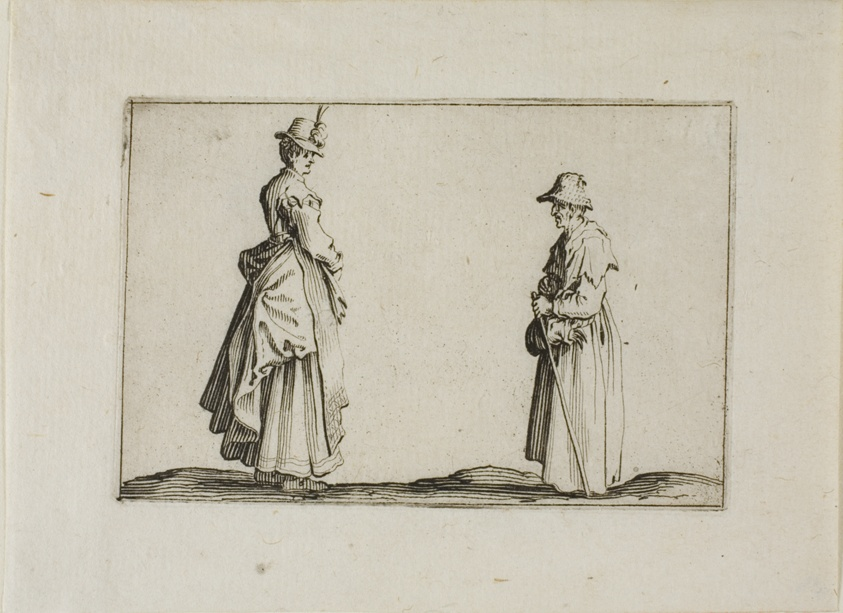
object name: Print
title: Two Women in Profile, from The Caprices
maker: Jacques Callot (French, 1592-1635)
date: c. 1622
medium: Etching on ivory laid paper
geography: France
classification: etching; print; prints and drawing